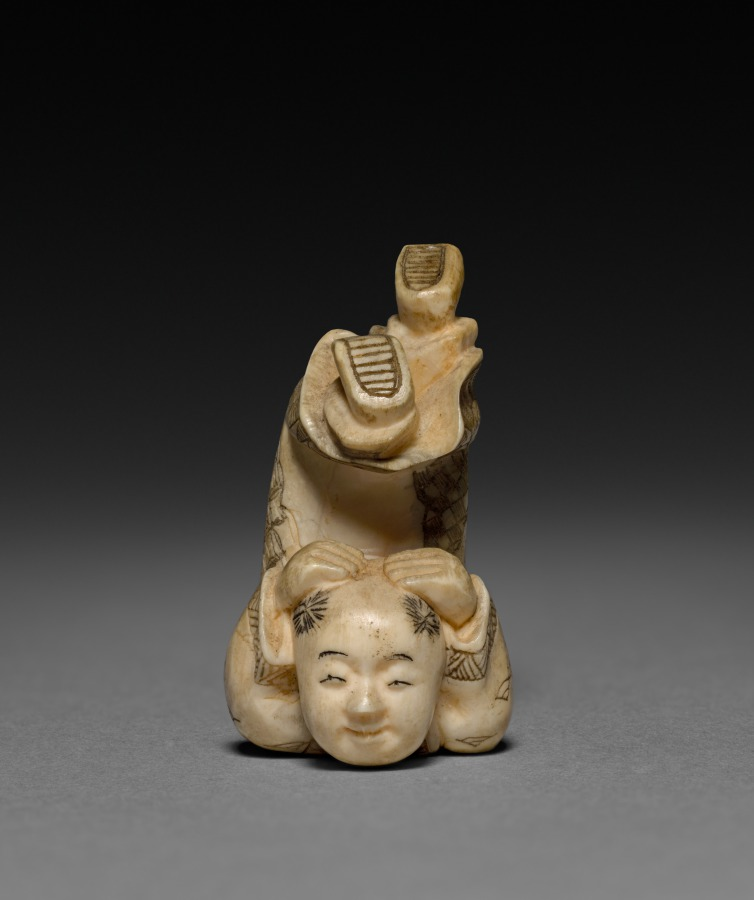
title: Netsuke of Child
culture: Japan, Meiji period (1868–1912)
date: early 1900s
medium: ivory, pigment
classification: Ivory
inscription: 玉心